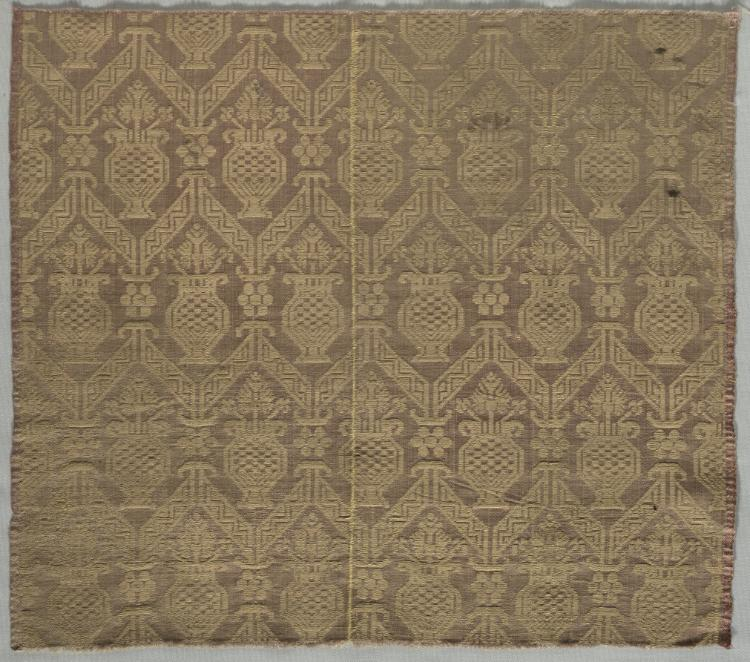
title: Textile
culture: Italy, late 16th century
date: late 1500s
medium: damask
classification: Textile